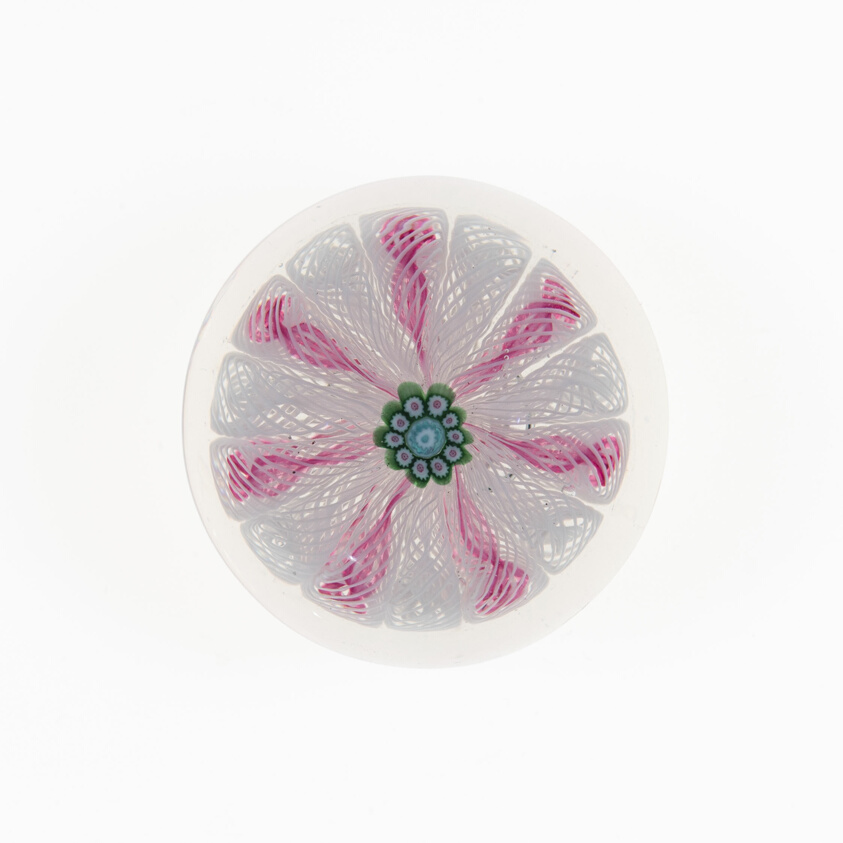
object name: Glass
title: Paperweight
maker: Saint-Louis Glassworks (Cristalleries de Saint-Louis); Lorraine, France, founded 1586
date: c. 1848–55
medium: Glass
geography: France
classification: paperweight; glass; european decorative arts